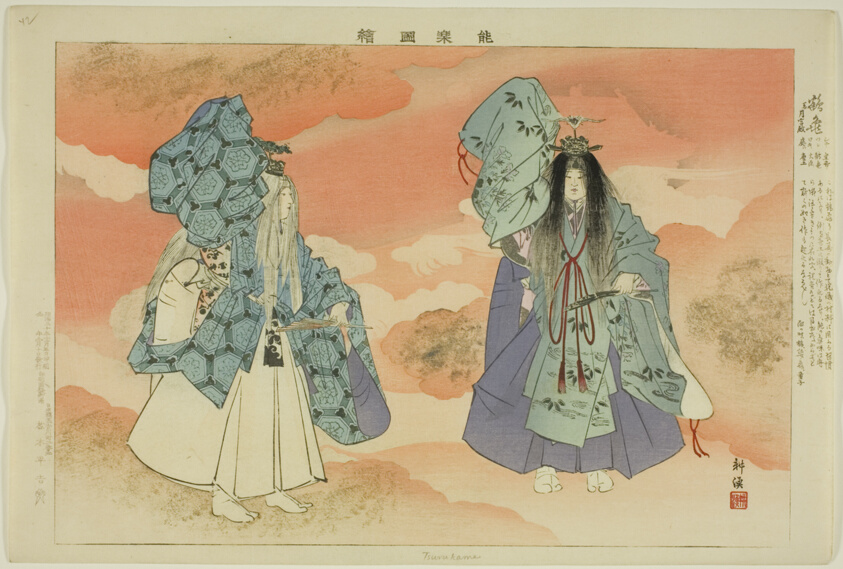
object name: Print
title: Tsuru-kame, from the series "Pictures of No Performances (Nogaku Zue)"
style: Japanese (culture or style)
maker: Tsukioka Kogyo; Japanese, 1869-1927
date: 1898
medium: Color woodblock print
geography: Japan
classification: woodblock print; print; asian art